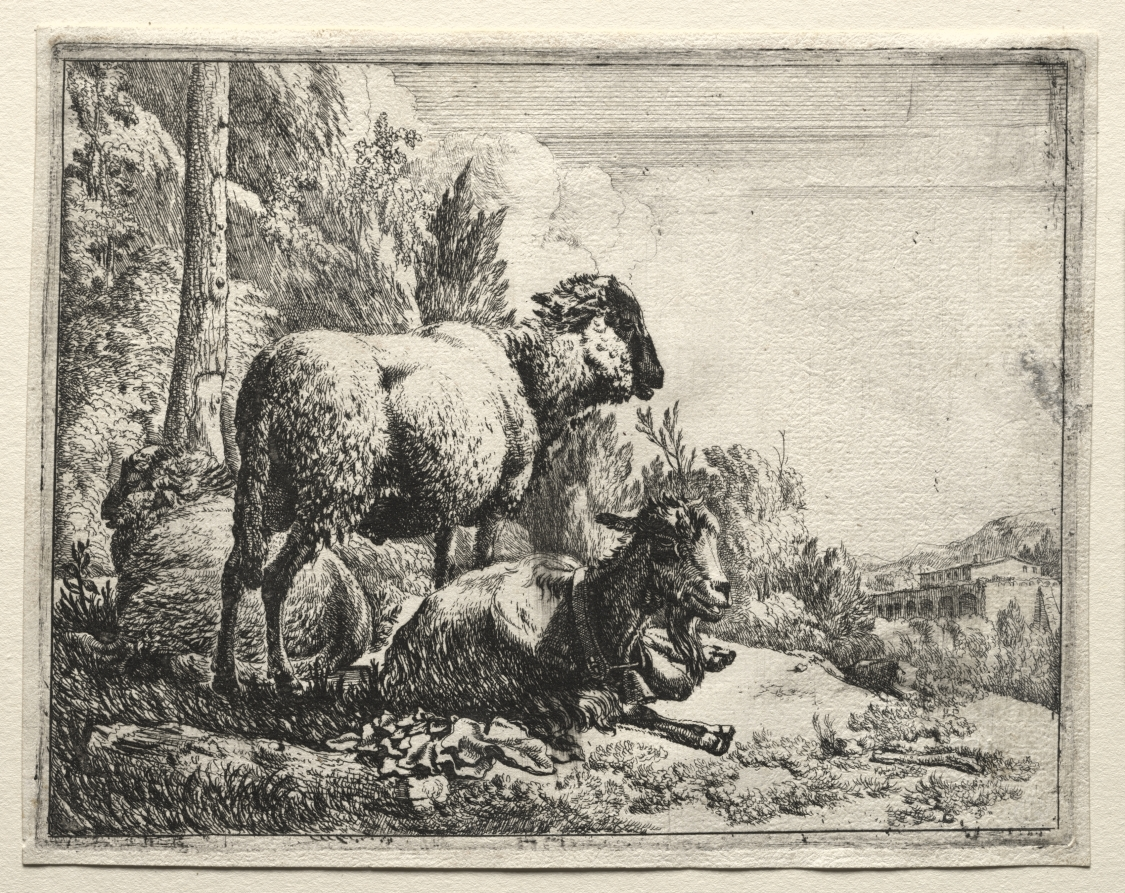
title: Goat with Bell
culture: Germany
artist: Johann Heinrich Roos (German, 1631–1685)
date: 1665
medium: etching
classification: Print